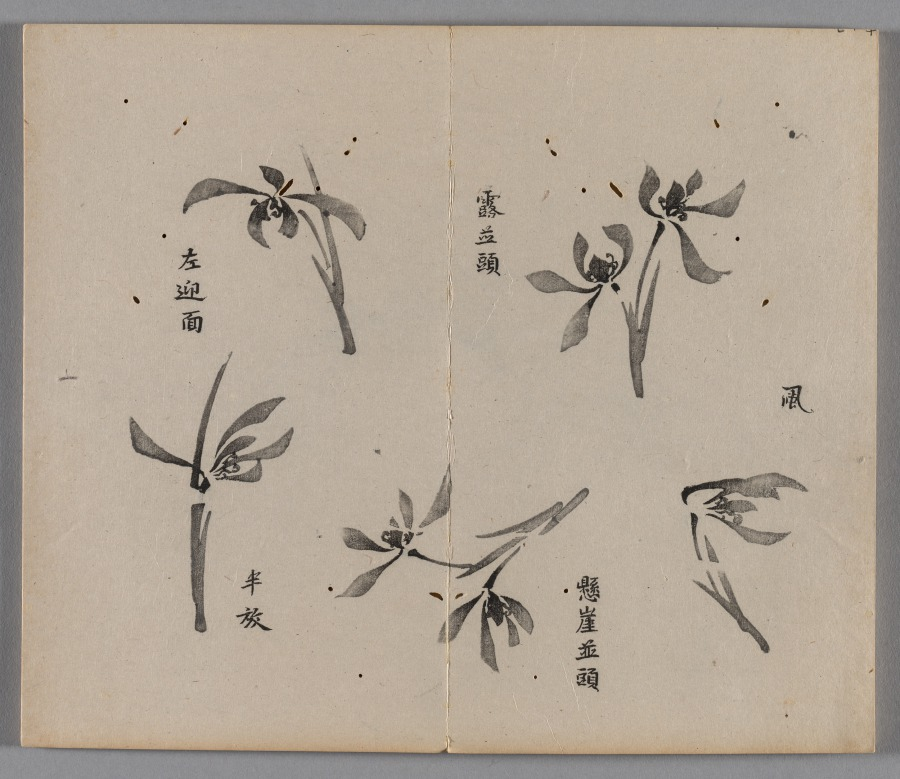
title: Ten Bamboo Studio Painting and Calligraphy Handbook (Shizhuzhai shuhua pu): Orchids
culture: China, Qing dynasty (1644-1911)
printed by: Hu Zhengyan (Chinese, c. 1584–1674)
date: 1633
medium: Woodblock-printed book; ink and colors on paper; first edition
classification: Print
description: Color printing reached a level of perfection in the early 1600s, as seen in this Ten Bamboo Studio Collection of Calligraphy and Painting and the Mustard Seed Garden Manual of Painting (printed 1679 and 1701). The painterly quality, precision in registering (aligning) the woodblocks, and harmonious colors made them the most successful color print editions in Chinese history. Both editions were printed and compiled in Nanjing, spread nationwide, and had a great impact on the arts in Japan and Korea.